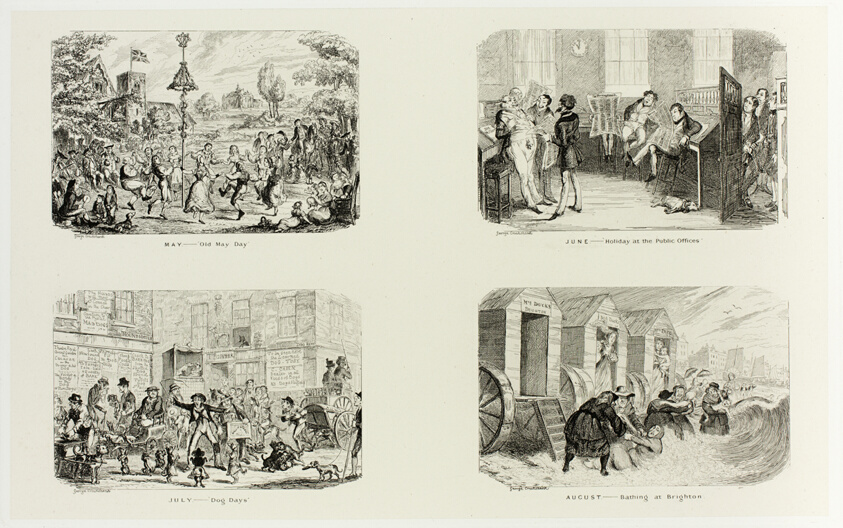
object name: Print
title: May – "Old May Day" from George Cruikshank's Steel Etchings to The Comic Almanacks: 1835-1853 (top left)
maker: George Cruikshank (English, 1792-1878); published by Pickering & Chatto (English, 19th century)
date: 1836, printed c. 1880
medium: Four steel etchings in black on cream India paper, laid down on off-white card (chine collé)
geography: England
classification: etching; paper; print; prints and drawing